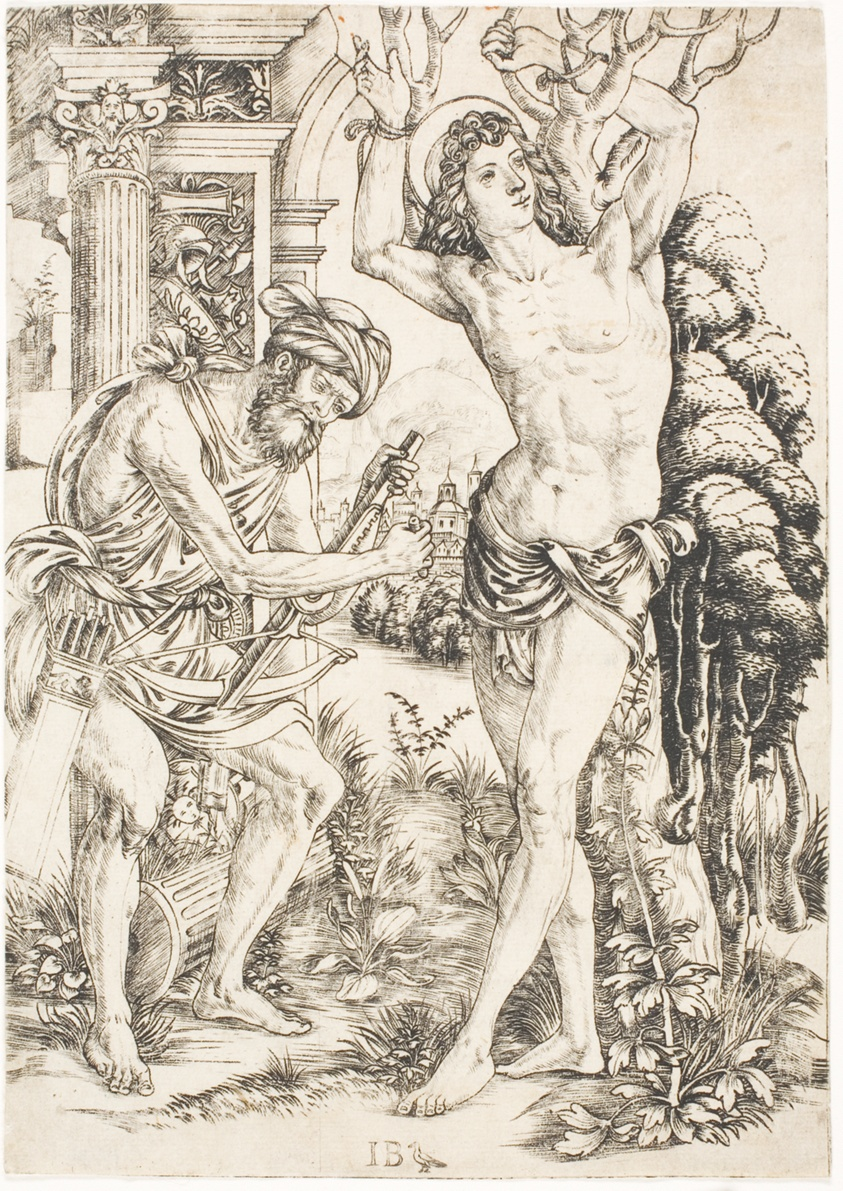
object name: Print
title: Saint Sebastian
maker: Master I.B. with the Bird (Italian, active c. 1500-1525)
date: 1506/07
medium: Engraving, on paper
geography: Italy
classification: engraving; print; prints and drawing